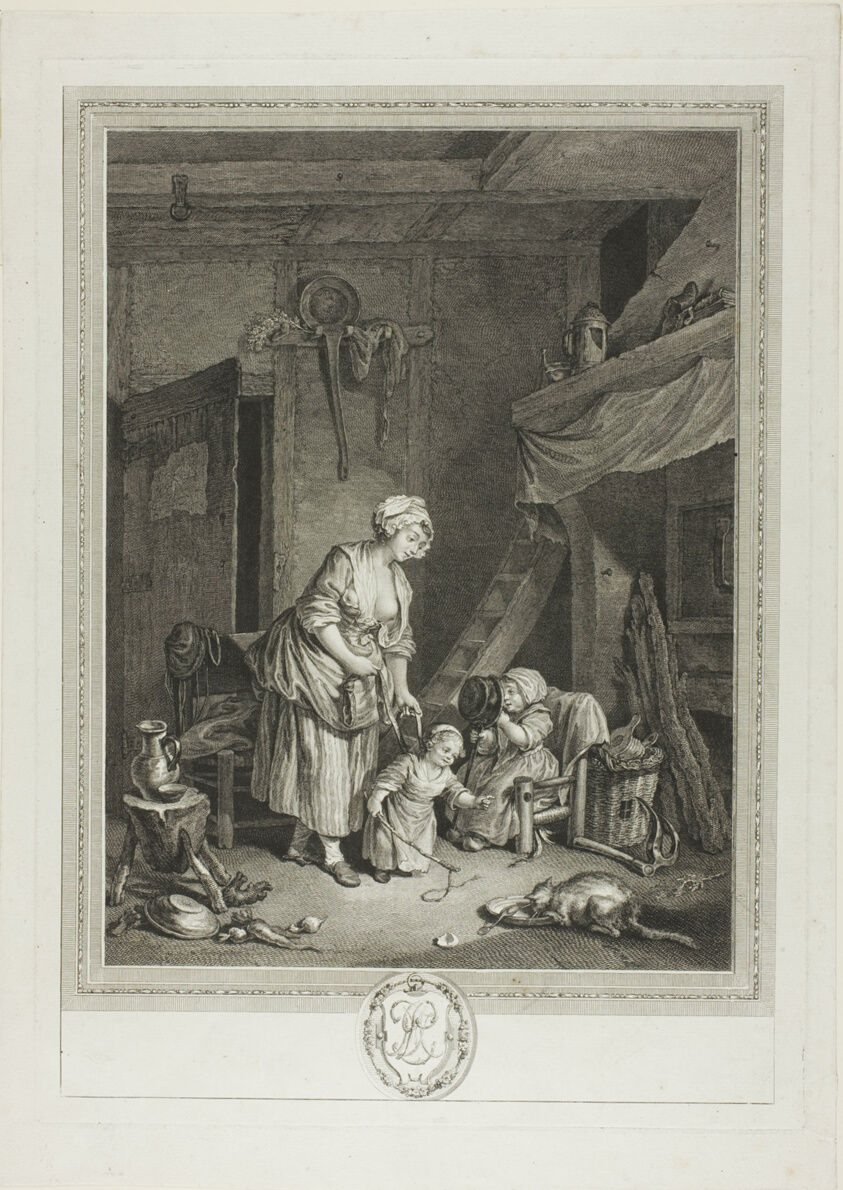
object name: Print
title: Maternal Indulgence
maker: Nicolas Delaunay (French, 1739-1792); S. Freudeberg (Swiss, 1745-1801)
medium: Etching and engraving in black ink on white laid paper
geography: France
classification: etching; print; prints and drawing